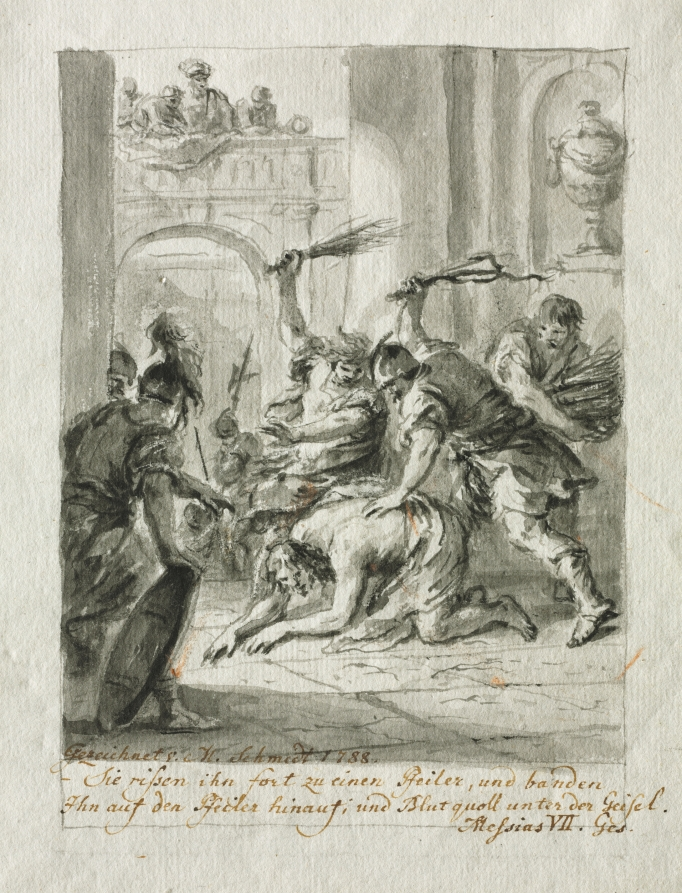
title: The Flagellation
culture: Germany, 18th century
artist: Martin Johann Schmidt (Austrian, 1718–1801)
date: 1788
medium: brush and gray ink and gray wash with black chalk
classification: Drawing